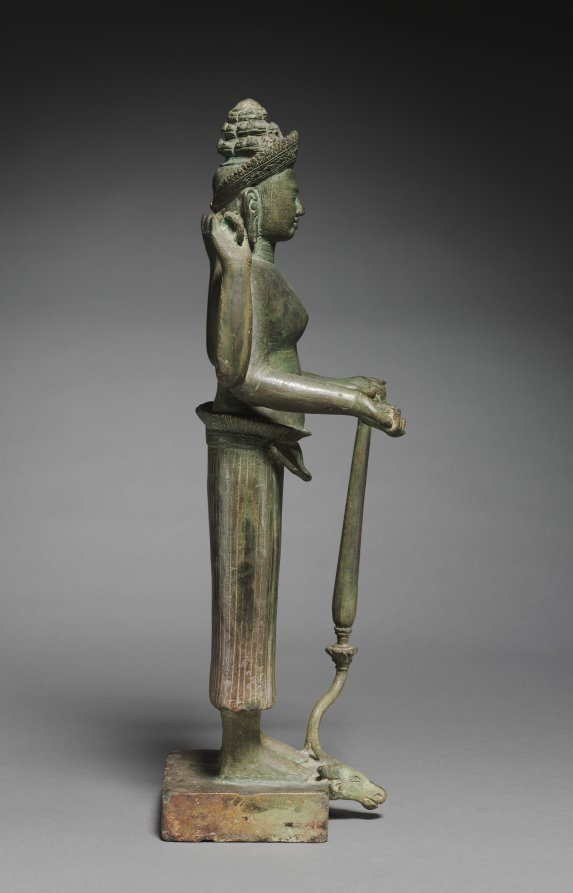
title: Durga as the Slayer of the Buffalo Demon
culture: Cambodia, probably Koh Ker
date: 900s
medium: bronze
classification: Sculpture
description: This depiction of Durga is rare and important, as it is a large-scale example of the goddess in bronze. Her conquest over the buffalo demon is indicated by its severed head at her feet. She stands four-armed and triumphant, with a wheel, conch shell, mace, and clod of earth in her hands.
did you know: The figure wears a head-dress, kirita-makuta, a diadem tied in the back and pointed at top.